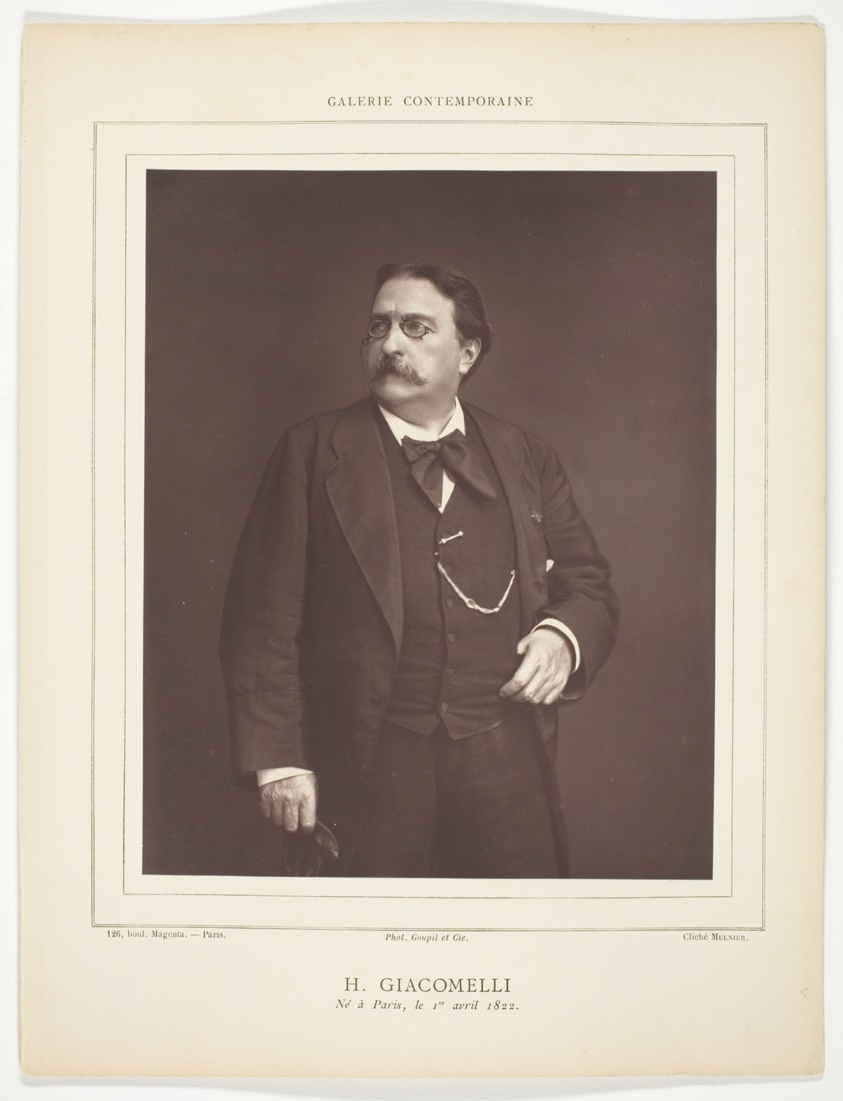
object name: Photograph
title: Hector Giacomelli (French painter, illustrator, and printmaker, 1822-1904)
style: 19th century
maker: Ferdinand J. Mulnier (French, born 1825, active 1860–1890)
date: c. 1876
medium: Woodburytype, from the periodical “Galerie Contemporaine Littéraire, Artistique” (1879), volume 8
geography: France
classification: woodburytype; photomechanical process; photography; photograph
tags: Collected by Hugh Edwards, Paris, Contemporaine Littéraire